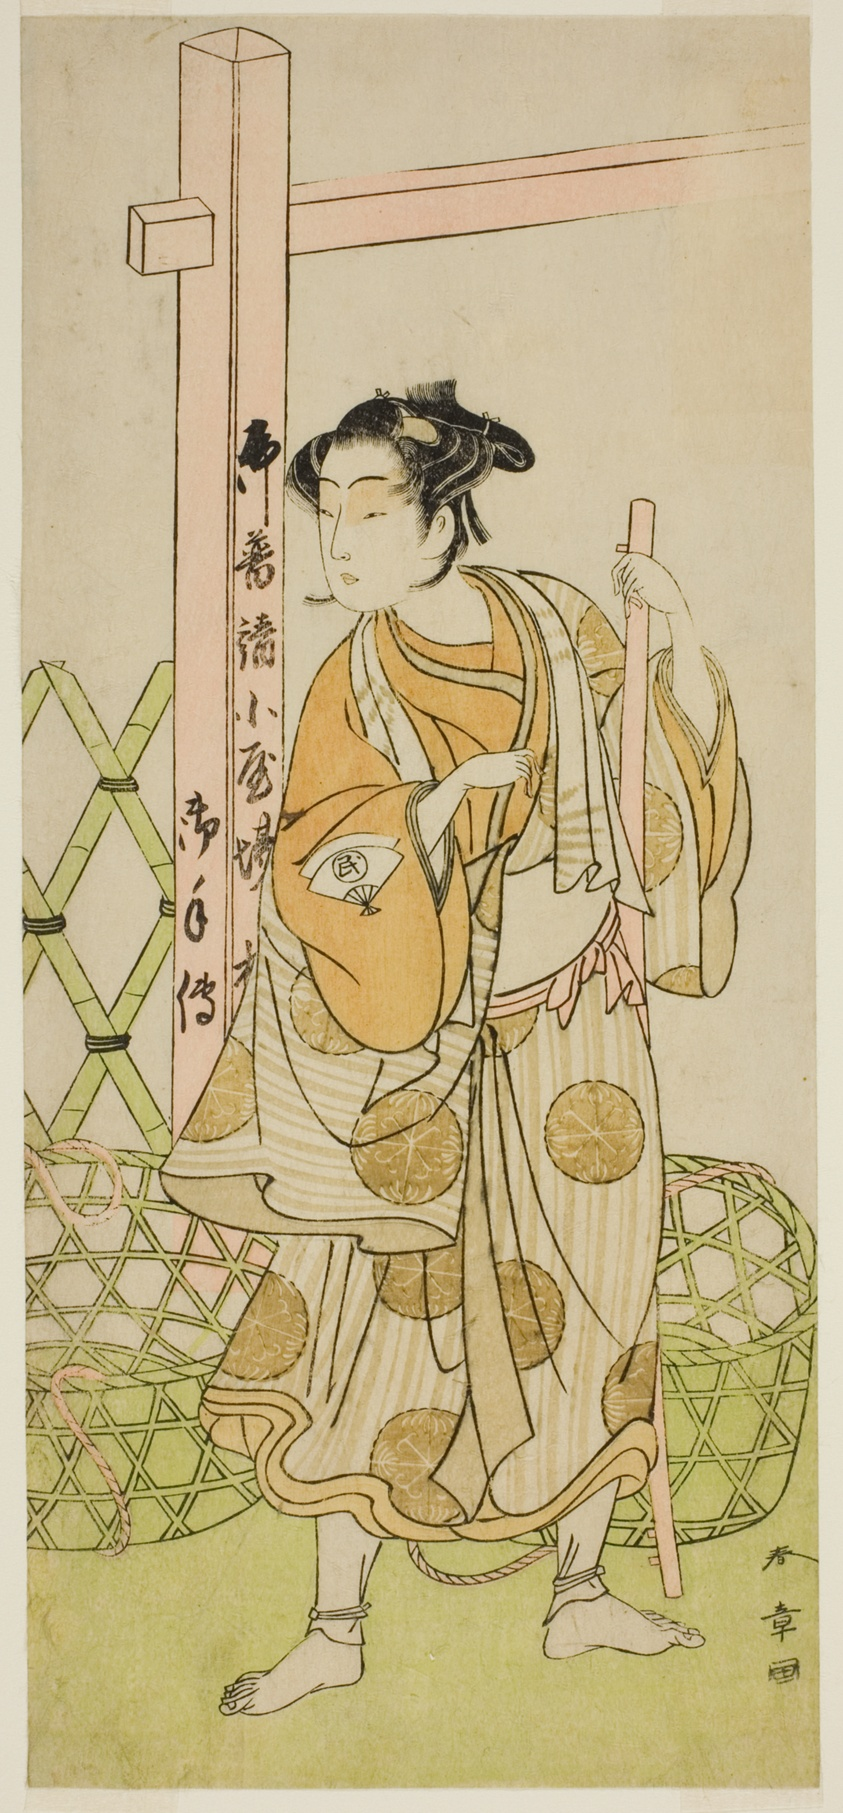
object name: Print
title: The Actor Onoe Tamizo I as Sotoku Taishi (?) Disguised as a Young Building Worker, in the Play Shitenno-ji Nobori Kuyo, Performed at the Ichimura Theater in the Eighth Month, 1773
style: Japanese (culture or style)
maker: Katsukawa Shunsho 勝川 春章; Japanese, 1726-1792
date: c. 1773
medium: Color woodblock print; hosoban; right sheet of diptych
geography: Japan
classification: woodblock print; print; asian art